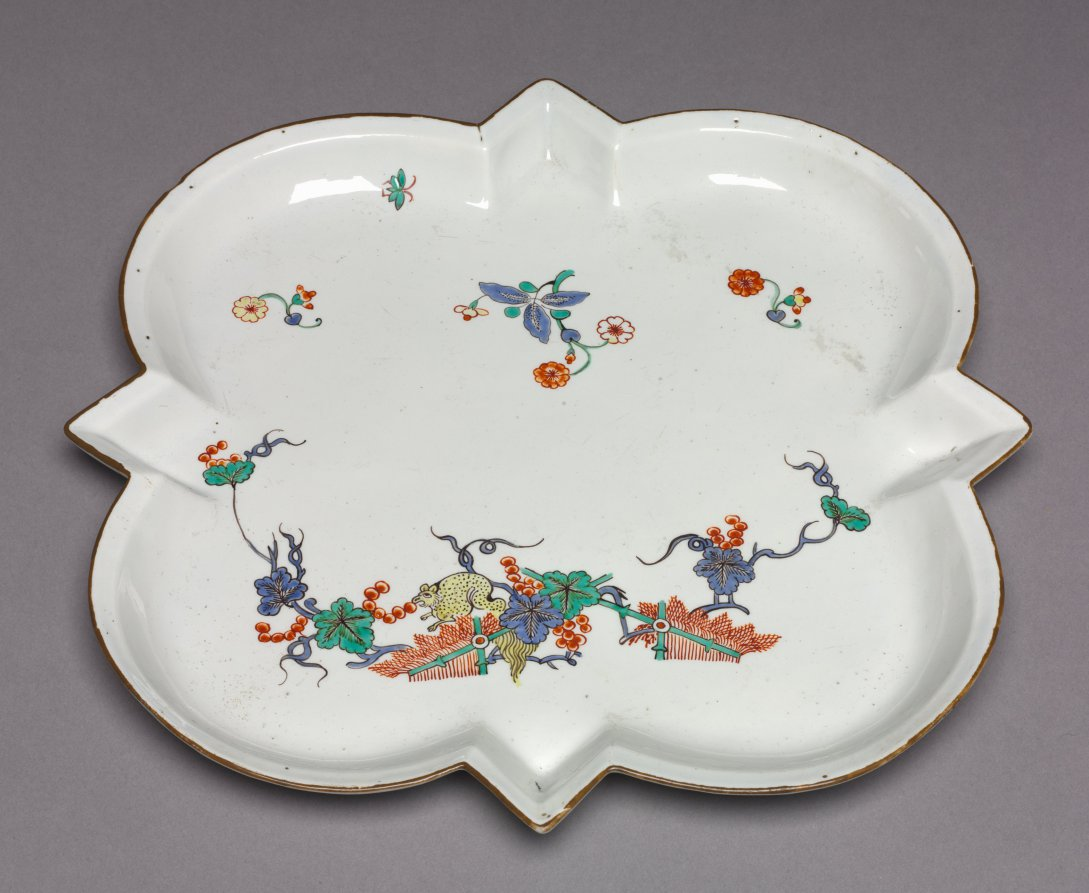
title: Tray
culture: France, Chantilly, 18th century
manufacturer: Chantilly Porcelain Factory (French)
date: c. 1730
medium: soft-paste porcelain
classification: Ceramic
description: The pieces composing this individual tea set are entirely typical of Chantilly soft-paste porcelain in the Kakiemon style. Both the form and decoration of these pieces were inspired by Japanese prototypes. The use of knobs in the form of trumpet-shaped blossoms is characteristic of Chantilly wares.